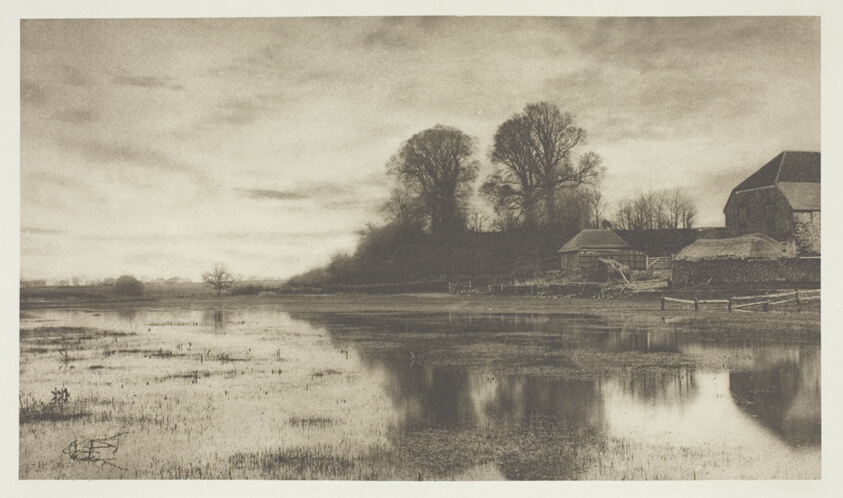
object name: Photograph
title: Eventide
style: 19th century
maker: J. B. B. Wellington (English, 1858–1939)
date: c. 1880/90, printed April 1890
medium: Photogravure, from "Sun Artists, No. 3" (1890)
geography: England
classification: photogravure; photomechanical process; photography; photograph